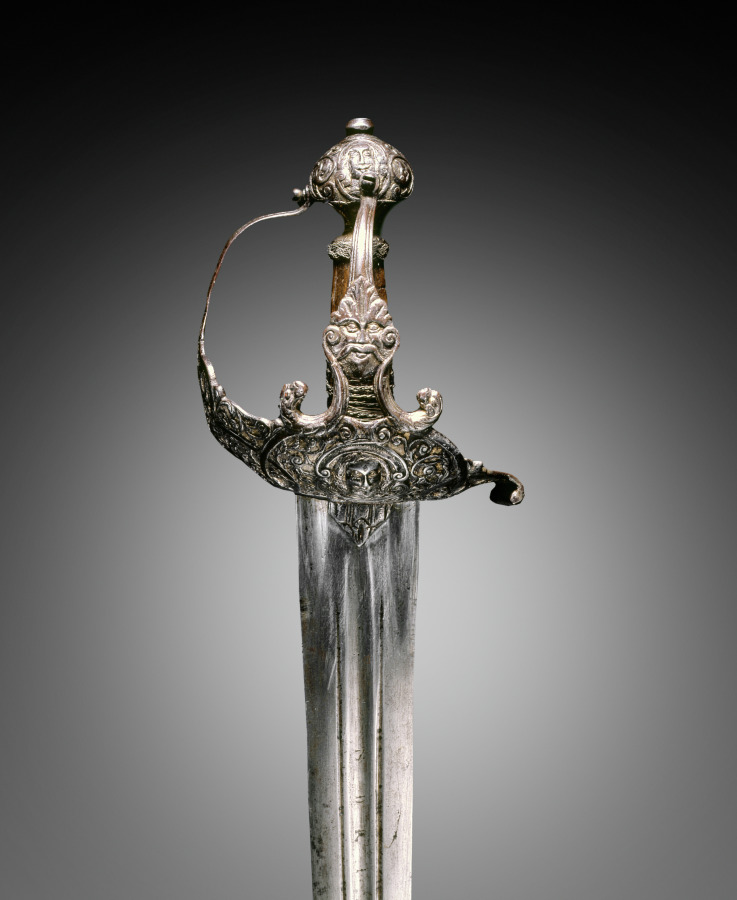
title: Basket-Hilt Broadsword ("Mortuary Sword")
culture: Hilt: England; Blade: Germany, Solingen (?), Hilt: 17th Century; Blade: 18th Century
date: hilt: c. 1640–50; blade: 1700s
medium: steel, chiseled; inlaid gilt- silver foil; wood and wire grip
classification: Arms and Armor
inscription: ANDRIA FERRARA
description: The decoration on this sword's hilt includes an image of King Charles I of England (beheaded in 1649). Because the image resembles the king's death mask, this sword is known as a "mortuary sword." It may have belonged to Sir Thomas Fairfax, a general of the Parliamentary cavalry during the English Civil War (1642-51). Large, double-edged broadswords, designed for heavy cavalry use, were common from the 1600s through the 1800s.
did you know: The ornate basket hilt which protects the hand, is chiseled with leafy decorative scrollwork and grotesque masks.